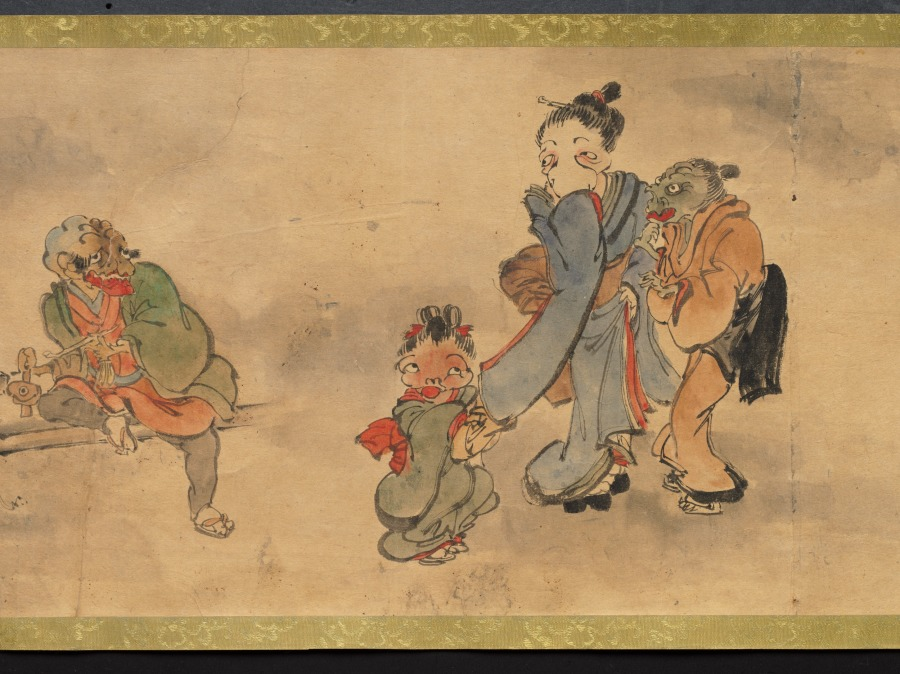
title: An Illustrated Marriage of Apparitions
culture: Japan, Edo period (1615–1868)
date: mid-1800s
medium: handscroll; ink and color on paper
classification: Painting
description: The matchmaking, engagement, wedding, and birth of the first child of two apparitions, or bakemono, literally "things that change," are illustrated in this whimsical, humorous handscroll. Japanese folklore abounds with such strange creatures, most famously represented in handscrolls featuring a procession of 100 supernatural monsters. Aside from a textual preface and cartouches indicating the content of the scenes, the tale is told visually. The artist and whereabouts of the original handscroll are unknown, but a number of other 19th-century copies by amateur painters exist in Japanese collections, attesting to its broad appeal.